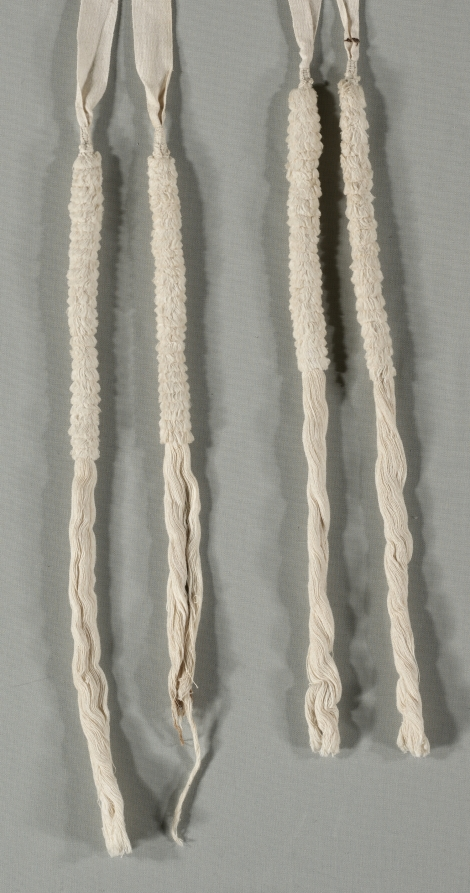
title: Band with Tassels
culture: Peru, North Coast, Chimú style, 1200-1460s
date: 1455–1625 (radiocarbon date, 95% probability)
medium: cotton; weft-faced plain weave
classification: Garment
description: This garment may have been found with others in the collection that formed a matched set worn by a noble of the Chimú, who rose to power on Peru’s north coast after the year 1000.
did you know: The Chimú forged an empire that thrived until the 1460s, when the Inka incorporated it into their own imperial domain.